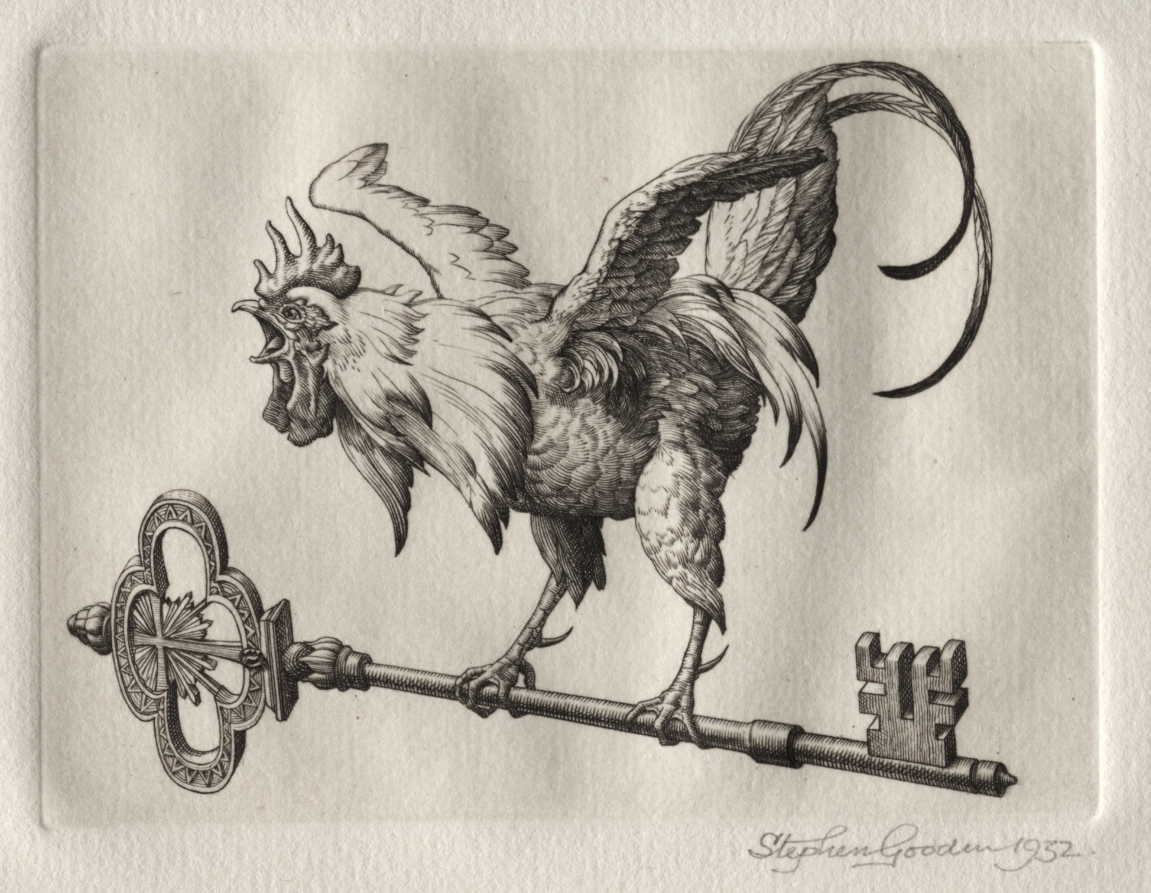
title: Illustration for "Peronnik the Fool": Cock Key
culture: England, 20th century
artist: Stephen Gooden (British, 1892–1955)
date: 1933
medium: engraving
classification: Print